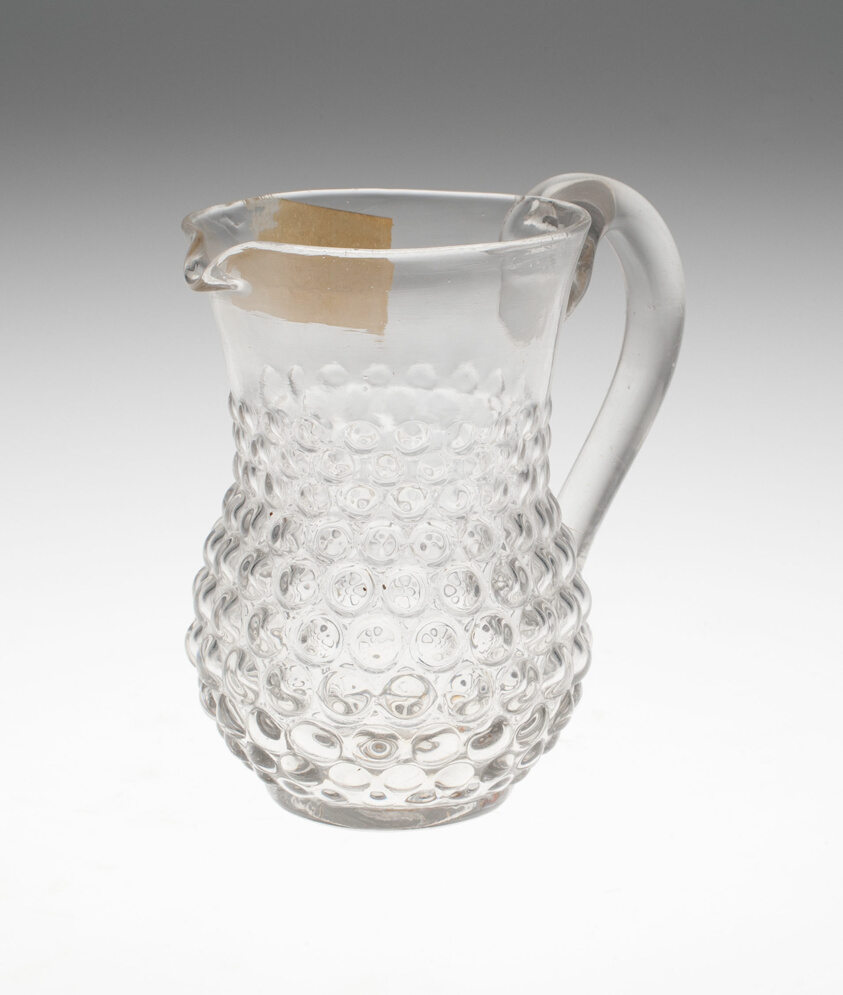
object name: Glass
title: Jug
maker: Spain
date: c. 1771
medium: Glass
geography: Spain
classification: glass; european decorative arts